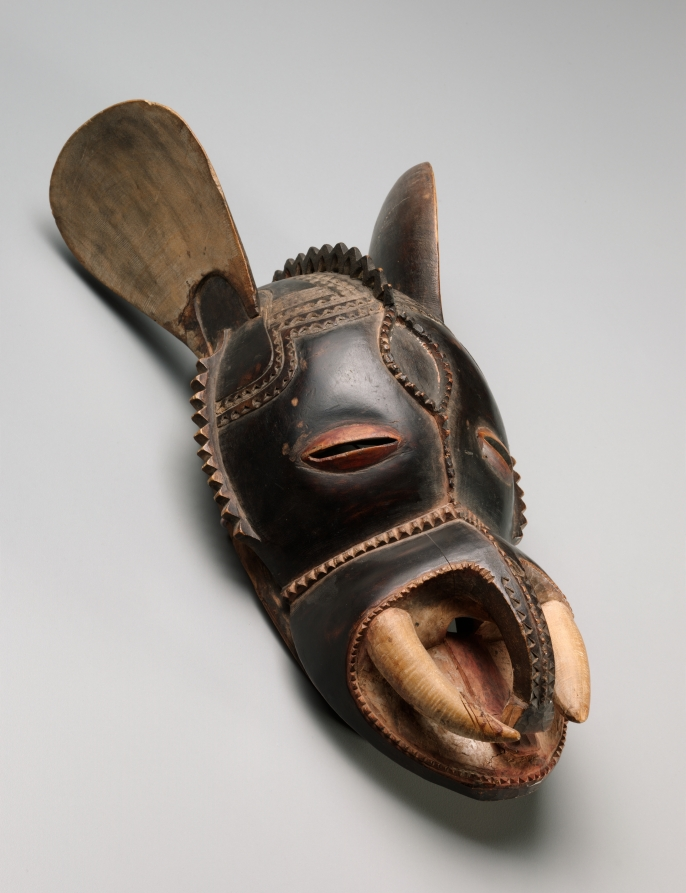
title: Face Mask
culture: Africa, West Africa, Côte d'Ivoire, possibly Yaure-style carver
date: early 1900s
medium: Wood, paint, and colorant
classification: Mask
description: Central Côte d'Ivoire is characterized by cultural assimilation and adoption. Connections can be seen in masquerades and in composite mask forms. Here, masks often blend human and animal features, and the depiction of elephant traits is a recurring theme. Yaure peoples associated elephant masks with a cult called Dye, and they appear when important sacrifices have to be made.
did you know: The carver compressed the scale of both the elephant's ears and tusks in this mask.